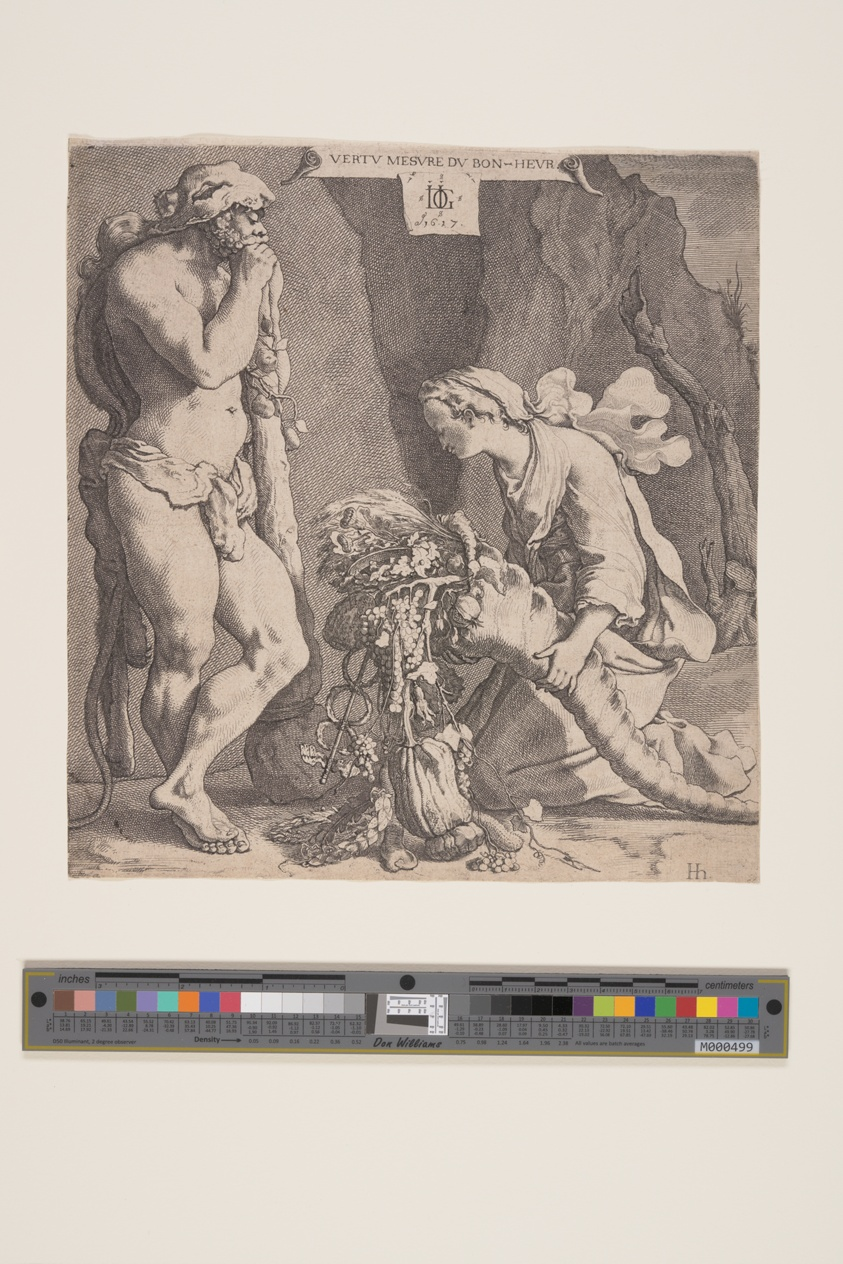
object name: Print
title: Fortuna Pouring Out the Horn of Plenty Before Hercules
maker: Jacques de Gheyn III; Dutch, c. 1596–1641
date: 1617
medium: Etching on laid paper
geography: Netherlands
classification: etching; paper; print; prints and drawing